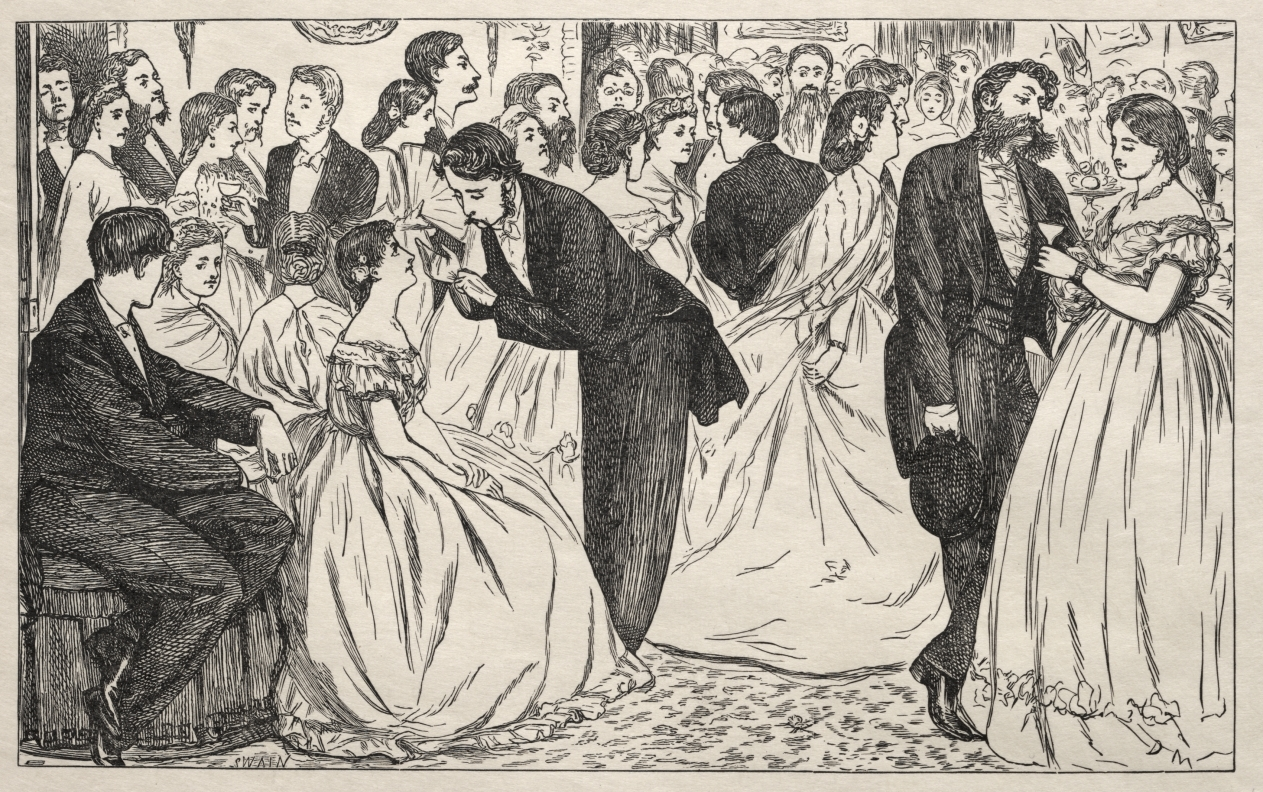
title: A Little Hop in Harley Street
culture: England, 19th century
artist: George Louis Palmella Busson Du Maurier (British, 1834–1896)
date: 1863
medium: wood engraving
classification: Print